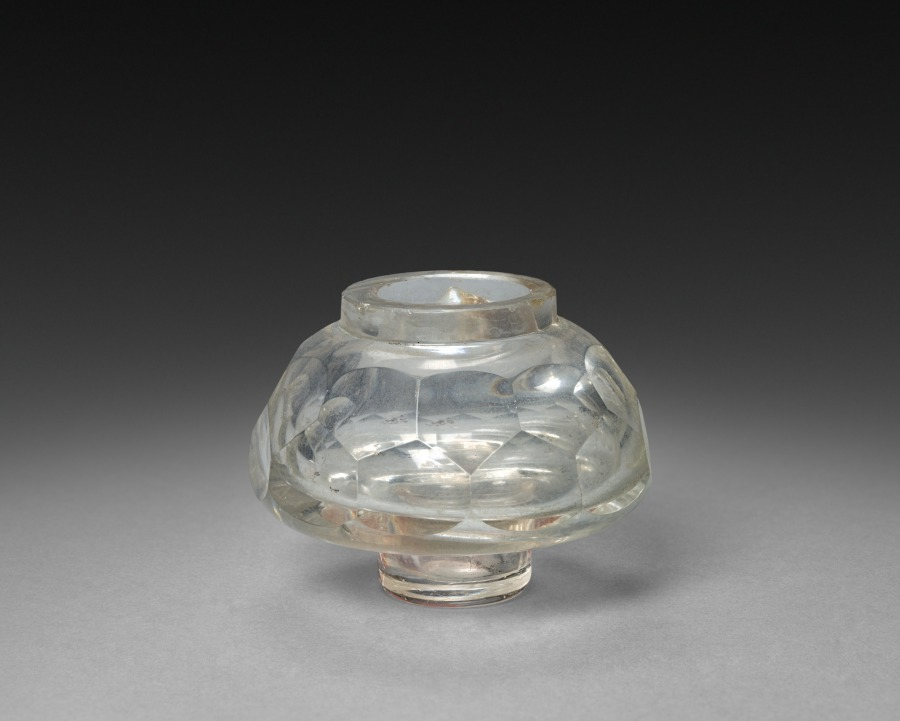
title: Inkwell (bottle)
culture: England or America, 19th century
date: 1825–1850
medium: gilt bronze and glass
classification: Metalwork